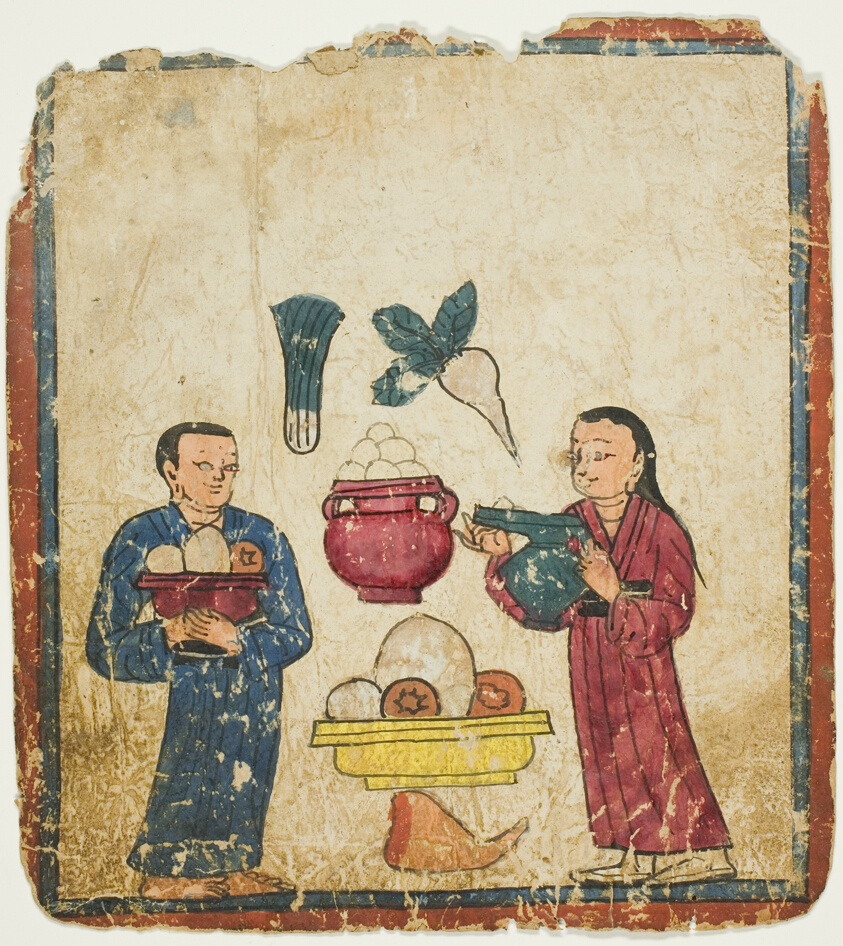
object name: Painting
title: Presentation of Offerings, from a Set of Initiation Cards (Tsakali)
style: Himalayan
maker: Southern Tibet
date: 14th/15th century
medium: Ink and watercolor on paper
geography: Tibet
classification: ink; painting